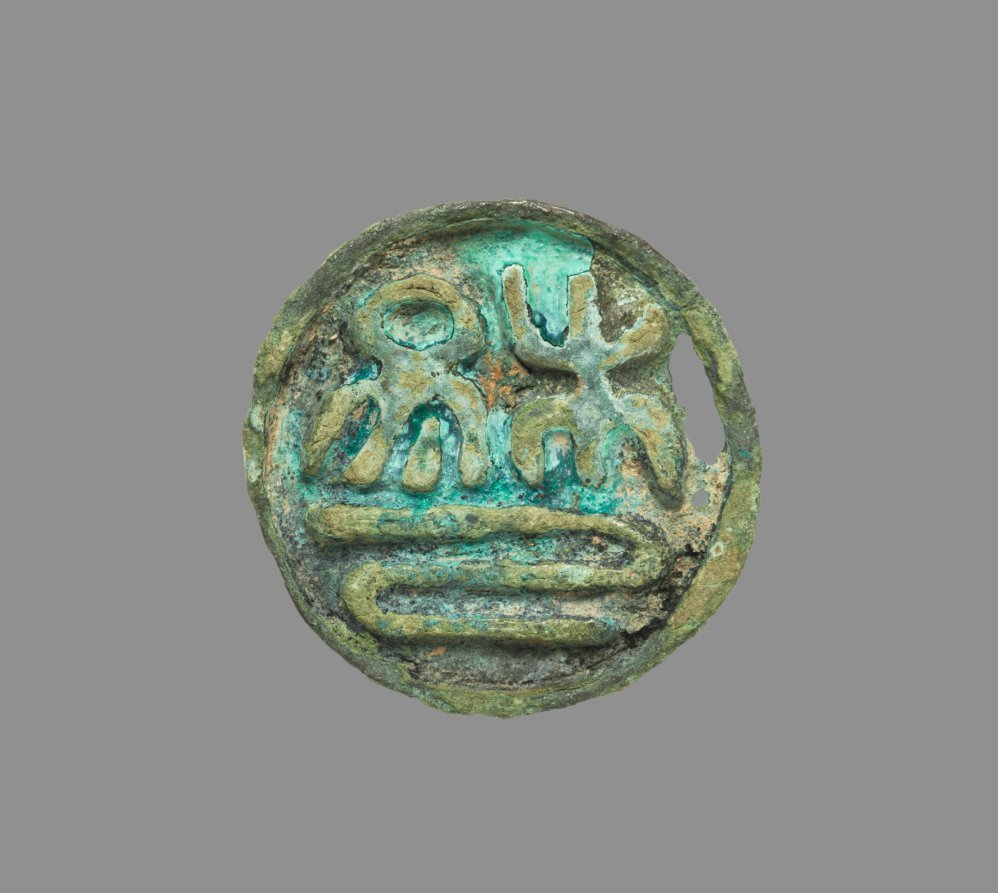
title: Seal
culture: Korea, Goryeo dynasty (918–1392)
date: 918–1392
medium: bronze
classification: Metalwork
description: A large quantity of bronze seals were excavated from tombs of the Goryeo dynasty. This bronze seal appears to have been used for stamping the sealed envelopes of letters. The lion-shaped ornament serves as the handle of the seal. While it is much corroded, the face and tail of the seated lion gazing upward are delicately expressed. Beneath the face of the lion is a hole through which a string can be threaded.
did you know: A large quantity of bronze seals excavated from tombs of the Goryeo dynasty is closely related to the development of metallurgy in 13th-century Korea that allowed the transition from wood type to movable metal type printing.